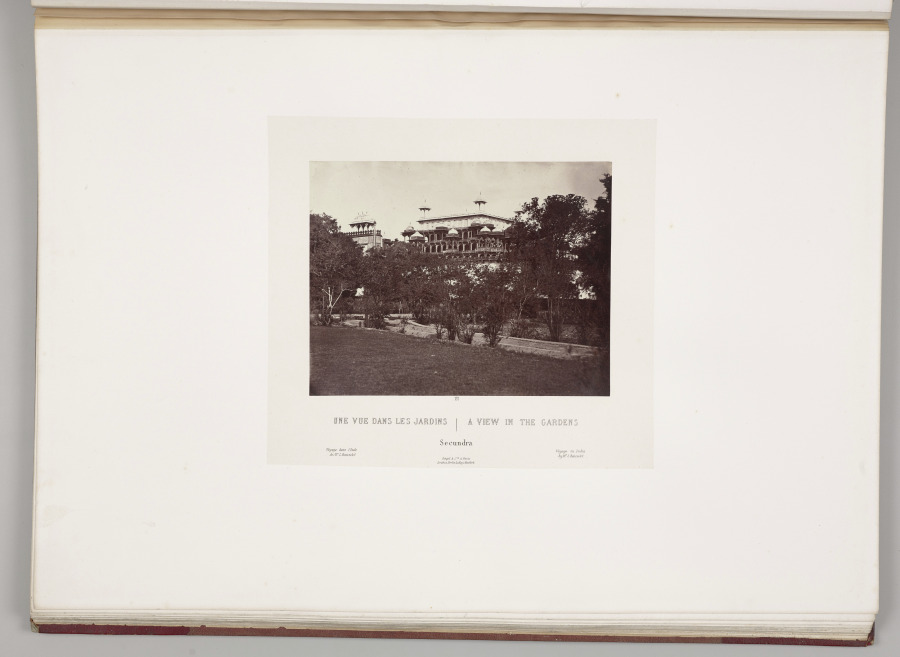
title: A View in the Gardens, Secundra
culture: France, 19th century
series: India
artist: Louis-Théophile Marie Rousselet (French, 1845–1929)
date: 1865–68, published 1869–70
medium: Albumen print from glass plate negative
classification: Photograph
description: Concerned that his drawings did not do justice to the splendor of India’s monuments, Rousselet learned photography in India that year, a remarkable accomplishment. He proved to be a talented photographer with a sophisticated sense of composition. The scenes in this volume sweep across sites of Sultanate, Rajput, and Mughal power in northern India, from the sacred Hindu city of Varanasi on the Ganges River to Alwar in Rajasthan. Also included are several scenes of industry and portraits of Indian rulers.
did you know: Louis Rousselet described himself as a “scientific traveler” when he went to India alone at age 18 in 1863 and stayed into 1868.